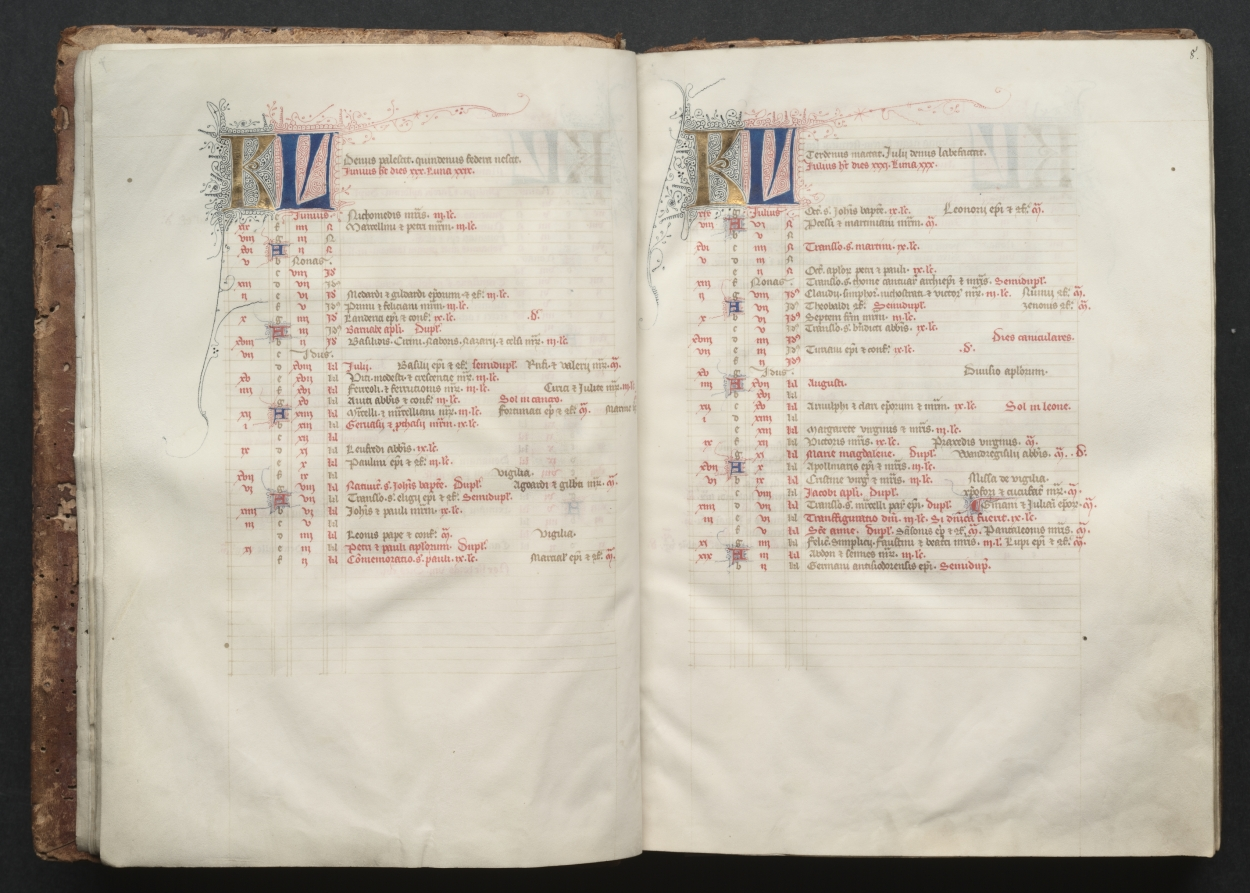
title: The Gotha Missal: Fol. 8r, Text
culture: France, Paris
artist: Master of the Boqueteaux (French)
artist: and Workshop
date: c. 1375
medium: ink, tempera, and gold on vellum; blind-tooled leather binding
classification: Bound Volume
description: The style and quality of this manuscript's decoration is typical of deluxe Parisian books made for aristocratic or royal patrons. Most of the book's decoration appears to be the work of the Master of the Boqueteaux, an artist active at the court of King Charles V (died 1380). His style was apparently shared by a number of book illuminators working in and around Paris. It is very possible that the Gotha Missal belonged to Charles V, but is not provable because the manuscript has no royal portraits and lacks a colophon. Given the book's magnificent decoration, however, it would seem that it was produced for a Valois prince, if not for the king himself. The manuscript receives its name from the German dukes of Gotha, its later owners.